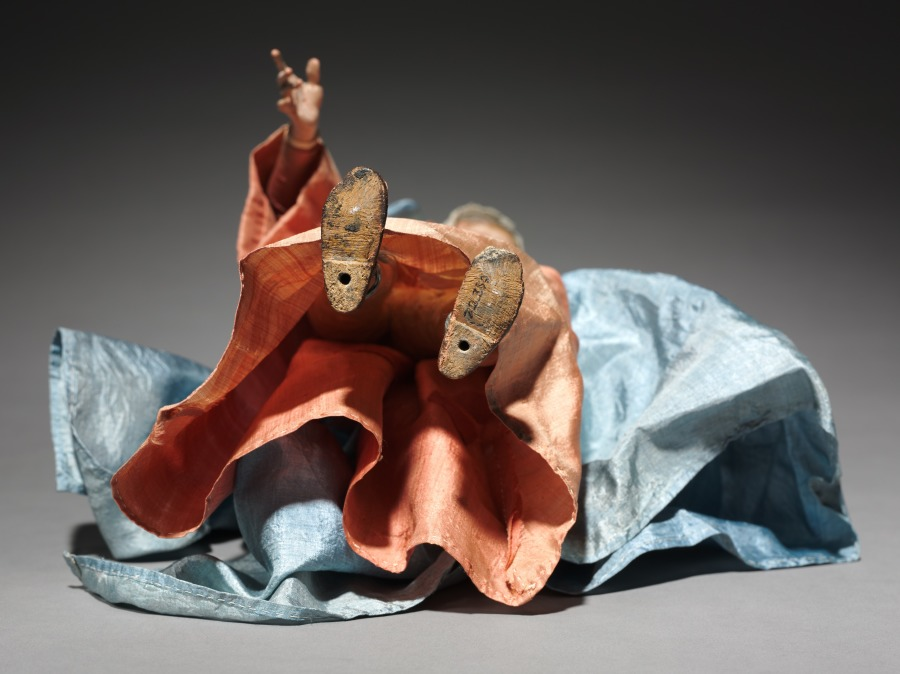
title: Figure from a Crèche: Virgin Mary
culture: Italy, Naples, late 18th-early 19th century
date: 1780–1830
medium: painted wood and terracotta with various textiles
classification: Sculpture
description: The practice of creating scenes of the Nativity for the home dates from the early 1700s in Italy, where people began to set up doll-like figures of about a foot or less in height. The custom was particularly popular in Naples around 1800, where crèche scenes (crèche means cradle, or crib) included many figures, whose heads and hands of painted terracotta, stuffed cloth bodies, and clothing adapted from contemporary local costumes gave them an amazingly realistic character. Representations of the birth of Jesus can be traced to the first few centuries of Christianity. Both living creatures and sculptural depictions of them were used from early times. By the late middle ages it was customary to create life-size figures of wood or stone, naturalistically painted, to represent the characters who participated in the events of Jesus's early life. These sculptures were then arranged in scenes illustrating one or both of the most important of these events, the Adoration of the Shepherds and the Adoration of the Magi-the three kings from the East who came to pay homage to the Christ child. Used in churches, these large figures were especially popular in Italy, Central Europe, Spain, and Portugal.